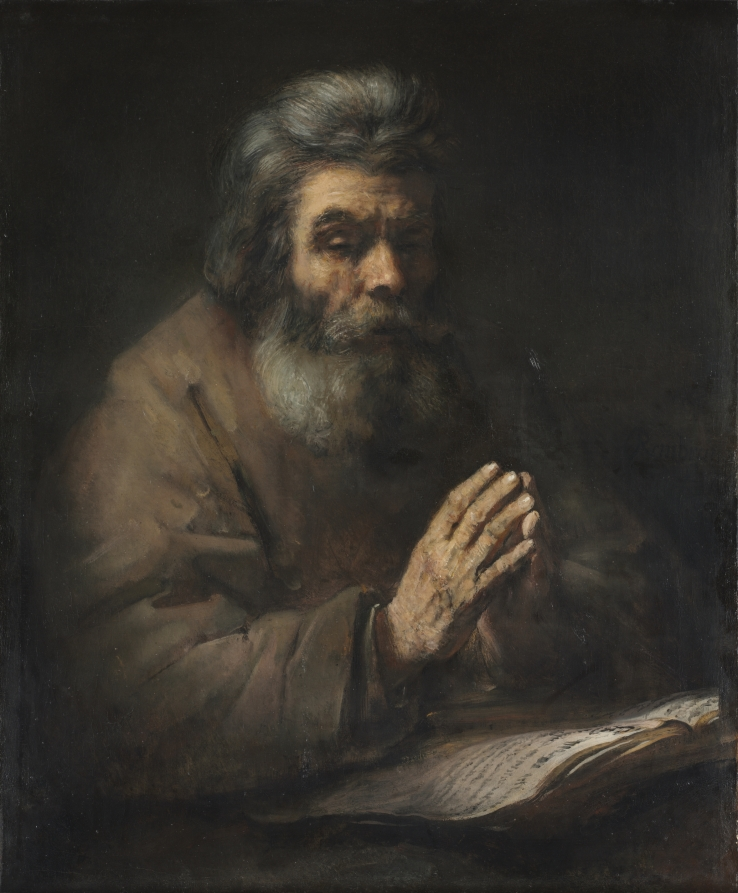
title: An Elderly Man in Prayer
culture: Netherlands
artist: follower of Rembrandt van Rijn (Dutch, 1606–1669)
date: 1660s or later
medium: oil on canvas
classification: Painting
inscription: Signed and dated at middle-right: "Rembrand[t]/ f.166[1]" (Last letter of name and last digit of date are no longer visible).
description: Toward the end of his life, Rembrandt explored religious themes from an intimate perspective, producing a number of works for a possible Apostle series. The personal religiosity of An Elderly Man in Prayer, formerly attributed to Rembrandt, bears resemblance to such late works. Seated with eyes nearly closed and hands clasped in prayer over a large book, the figure appears still and introspective. While the dramatic lighting and dark color palette are reminiscent of Rembrandt's late works, this painting, formerly attributed to the artist, has since been assigned to a follower or a later eighteenth-century imitator of Rembrandt's style for reasons associated with the broad, flat brushwork of the garment, the poor handling of shadow on the hands, and the uniform treatment of the hair.